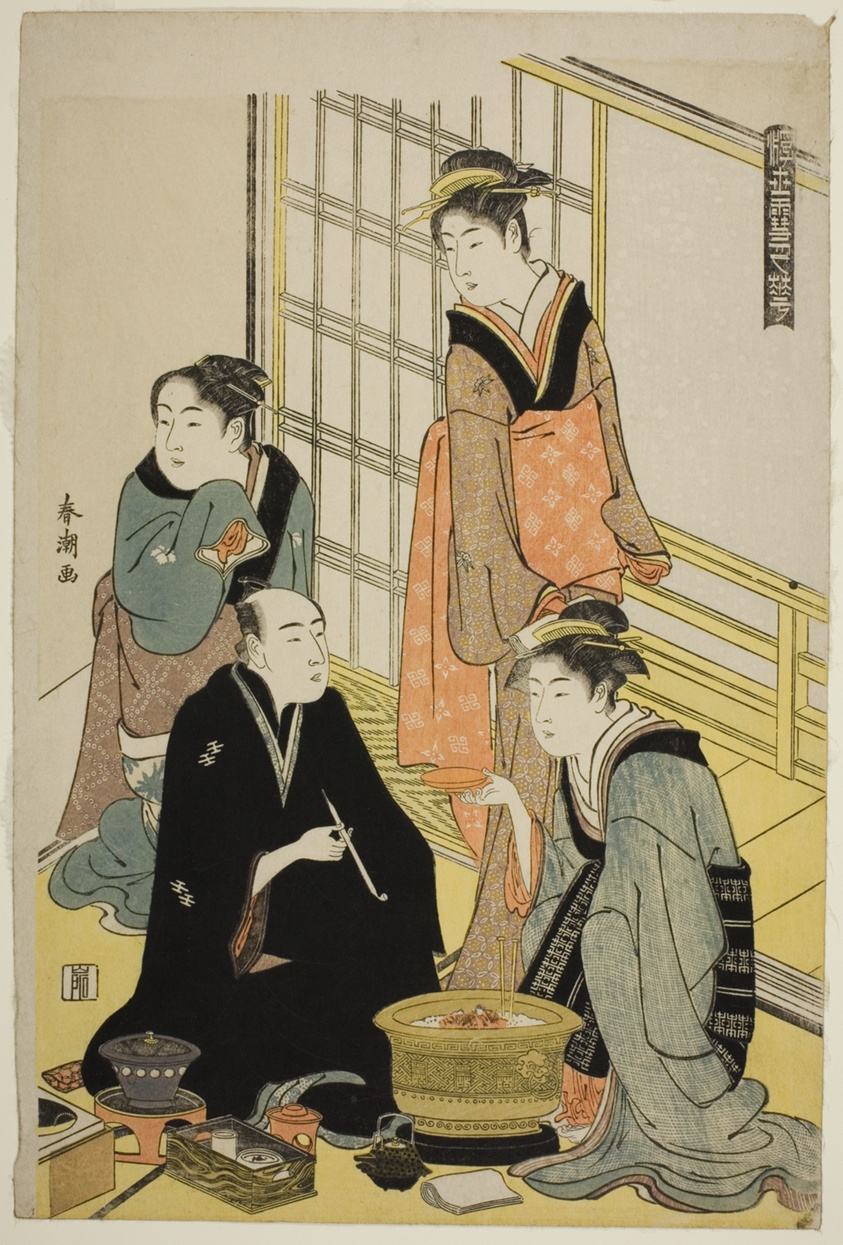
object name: Print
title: Snow, from the series "Snow, Moon, and Flowers of the Floating World (Ukiyo setsugekka)"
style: Japanese (culture or style)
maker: Katsukawa Shuncho; Japanese, active c. 1780-1801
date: c. 1784/85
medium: Color woodblock print; oban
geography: Japan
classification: woodblock print; print; asian art